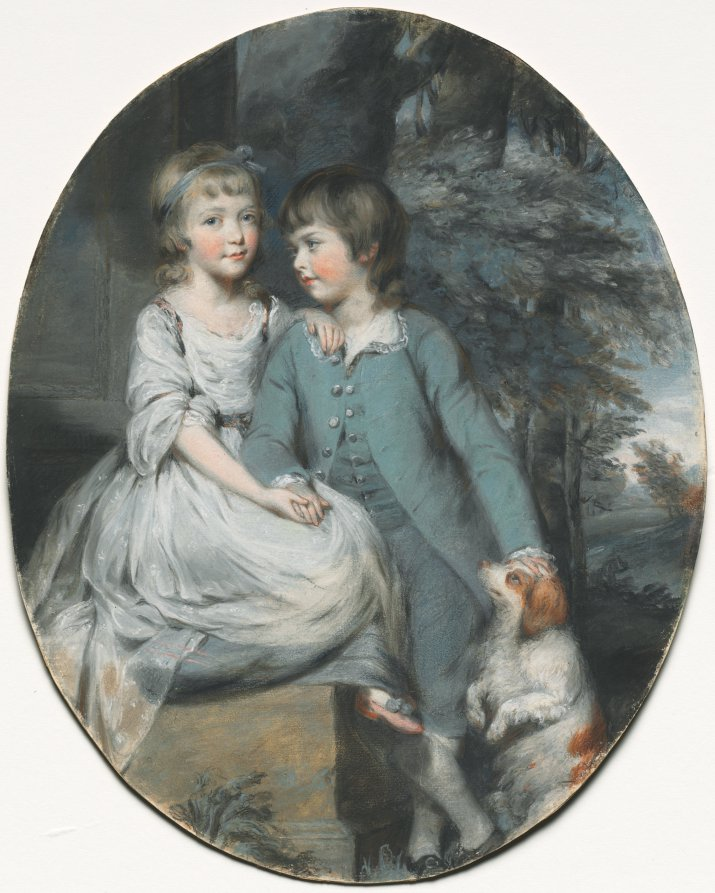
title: Cropley Ashley-Cooper (Later 6th Earl of Shaftesbury) with His Sister Mary Anne Ashley-Cooper, Later Lady Sturt of Crichel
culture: England, 18th century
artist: Daniel Gardner (British, c. 1750–1805)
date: c. 1776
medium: pastel with black and red chalk and graphite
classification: Drawing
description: Daniel Gardner built a lucrative career that was based on fashionable portraiture, especially small-scale works in pastel, often in oval formats with landscape backgrounds. Executed in this format, this portrait is one of many by the artist that depicted children, his primary subjects. Here, the young Cropley Ashley-Cooper, later the 6th Earl of Shaftesbury, gazes fondly at his older sister, Mary Anne, who holds his hand and encircles his shoulders in close affection. Gardner took advantage of the special optical properties of pastel, whose minute, irregular particles reflect light diffusely, allowing an unparalleled velvety brilliance.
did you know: This pastel was presumably commissioned from Daniel Gardner by the children's father, who was himself the subject of a portrait by the artist.